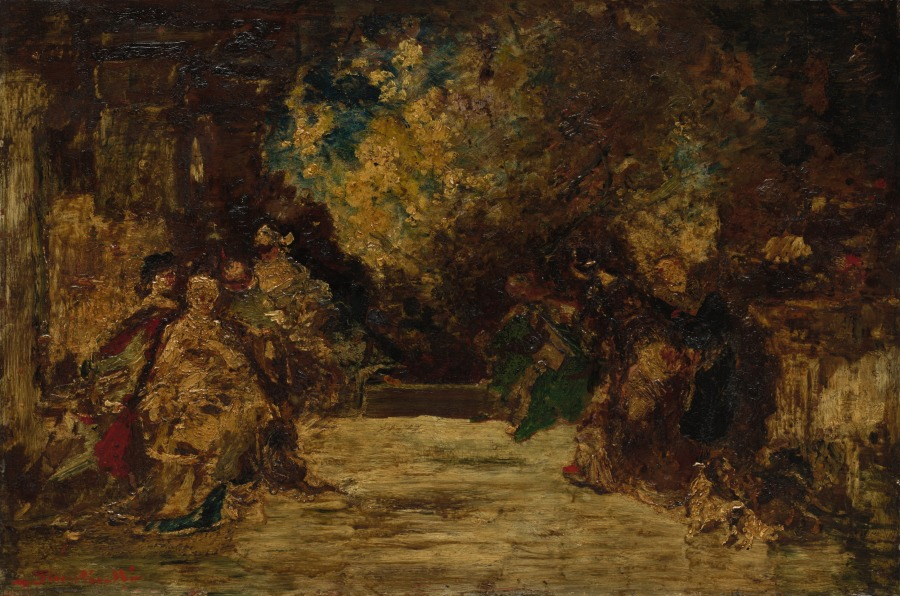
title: Figures on a Terrace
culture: France, 19th century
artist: attributed to Adolphe Monticelli (French, 1824–1886)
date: not dated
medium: oil on wood panel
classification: Painting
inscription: Signed lower left: Monticelli